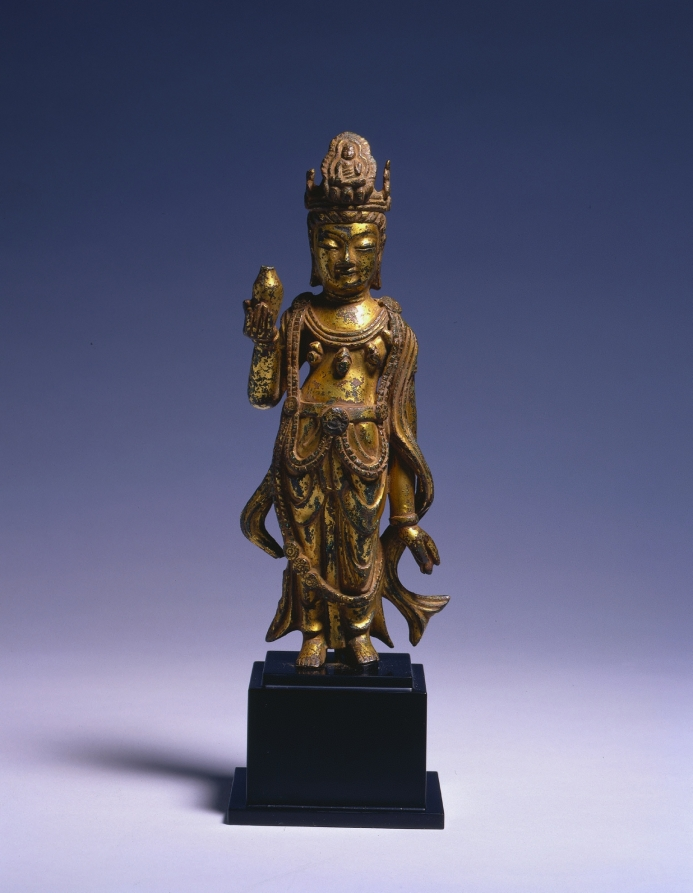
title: Standing Avalokitesvara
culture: Korea, Unified Silla period (668-935)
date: 700s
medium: Gilt-bronze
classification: Sculpture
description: This small gilt-bronze statue represents the Bodhisattva of Compassion (관음보살 in Korean), an enlightened being who helps devotees on their path. It features two prominent attributes: a water sprinkler (kundika in Sanskrit) and a miniature image of Buddha Amitābha in its jeweled crown. Its sweet and gentle smile accentuates this celestial being’s immeasurable compassion for human suffering.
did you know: Created during the Unified Silla period, a high point of the spread of Buddhist teachings, this kind of miniature gilt-bronze statue was often used as a portable object of devotion by traveling Buddhist monks.